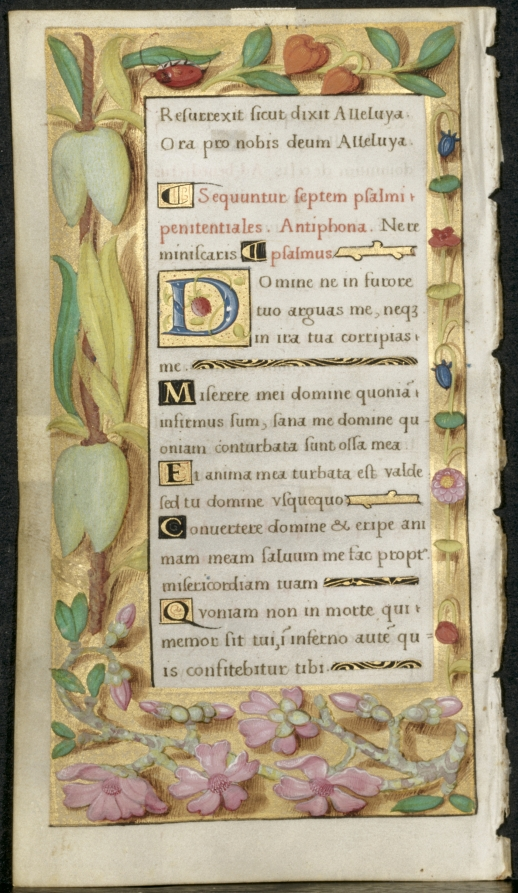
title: Leaf from a Book of Hours: Penitential Psalms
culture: France, 16th century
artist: Noël Bellemare (French, d. 1546)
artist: The 1520s Hours Workshop (French)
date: c. 1530–1535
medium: ink, tempera and liquid gold on vellum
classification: Manuscript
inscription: Resurrexit, sicut dixit, alleluia: Ora pro nobis Deum, alleluia. Sequuntur septem pfalmi penitentiales. Antiphona. Ne reminiscaris. psalmus: Domine , ne in durore tuo arguas me Miserere mei domine quoniam infirmus sum : sana me domine, quoniam conturbata sunt ossa mea Et anima mea turbata est valde : sed tu domine usquequo Convertere domine et eripe animam meam : salvum me fac propter misericordiam tuam. Quoniam non est in morte qui memor sit tui : in inferno autem quis confitebitur tibi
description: The 1520s Hours Workshop produced luxury books of hours for a wealthy, often royal, clientele. Recent evidence points to Paris as the site of the workshop’s activity under the direction of Antwerp-born miniaturist Noël Bellemare (died 1546). Containing fuschia pinks and bright acid greens, the palette is unusual in French manuscript painting of the period. Instead, Bellemare’s miniatures point directly to Antwerp painting at the time.